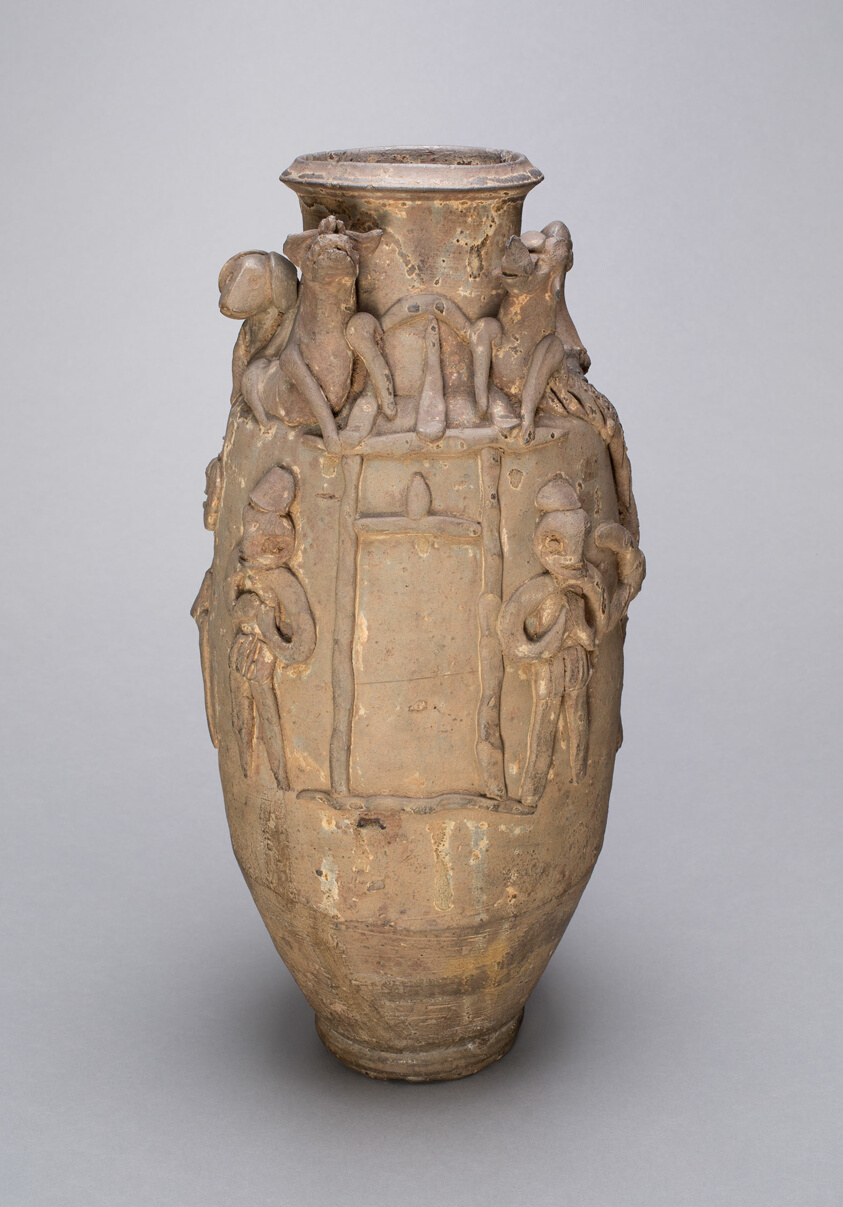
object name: Vessel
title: Ovoid Jar with Animals and Figures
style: Chinese (culture or style)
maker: China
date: Probably Han Dynasty (206 B.C.–221 A.D.)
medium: Earthenware with molded relief decoration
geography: China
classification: ceramics; asian art; vessel